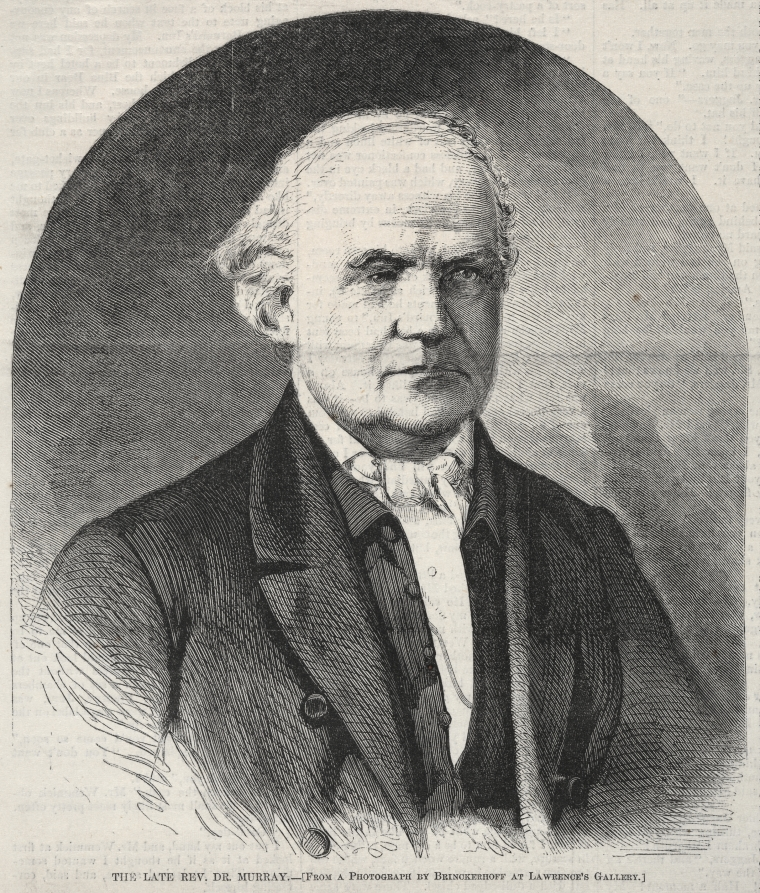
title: The Late Rev. Dr. Murray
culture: America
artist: Winslow Homer (American, 1836–1910)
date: 1861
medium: wood engraving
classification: Print